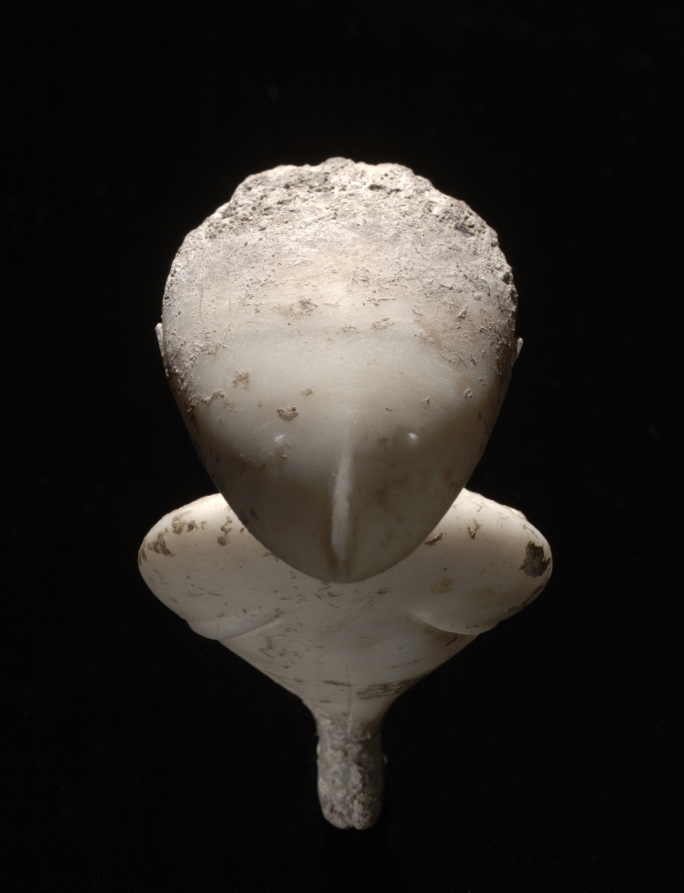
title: Statuette of a Woman: "The Stargazer"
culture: Western Anatolia, early Bronze Age (c. 3300–1200 BCE)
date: c. 3000 BCE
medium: marble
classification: Sculpture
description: "The Stargazer" moniker was given to this diminutive marble sculpture because its upturned head looks toward the heavens. Details carved into the stone are visible while painted features have been lost to time. We do not know how this object was used, but its enigmatic nature invites speculation.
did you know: We can identify this mysterious figure as female by the inscribed pubic triangle below her waist.